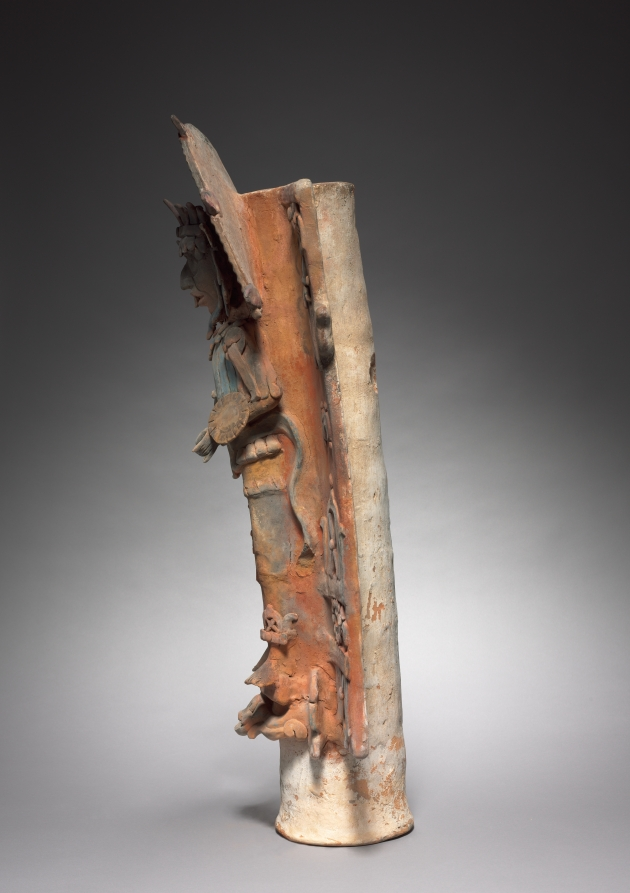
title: Incensario (Incense Burner) Support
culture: Mesoamerica, Maya, Palenque region, Classic Period (250-900) or modern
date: 600–900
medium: earthenware with pigments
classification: Sculpture